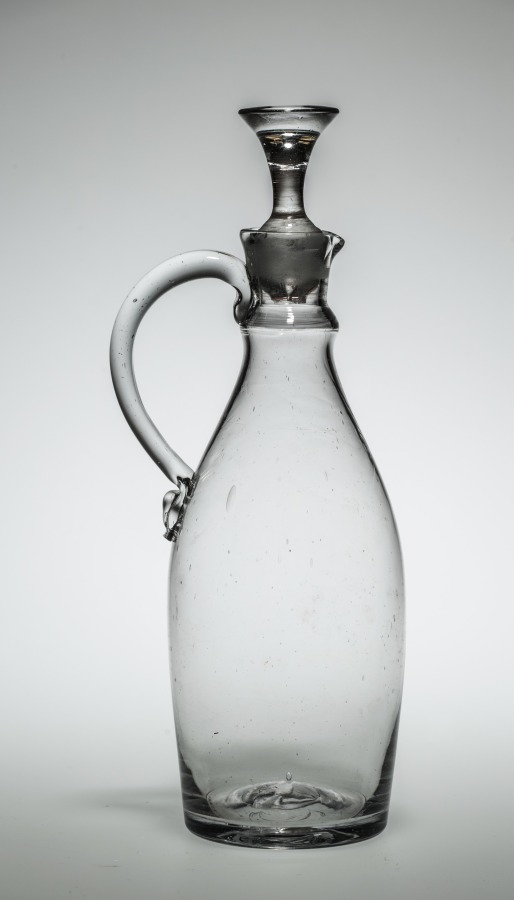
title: Cruet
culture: France, probably modern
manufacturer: Héraud- LeRoy Factory (French)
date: c. 1740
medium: glass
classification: Glass